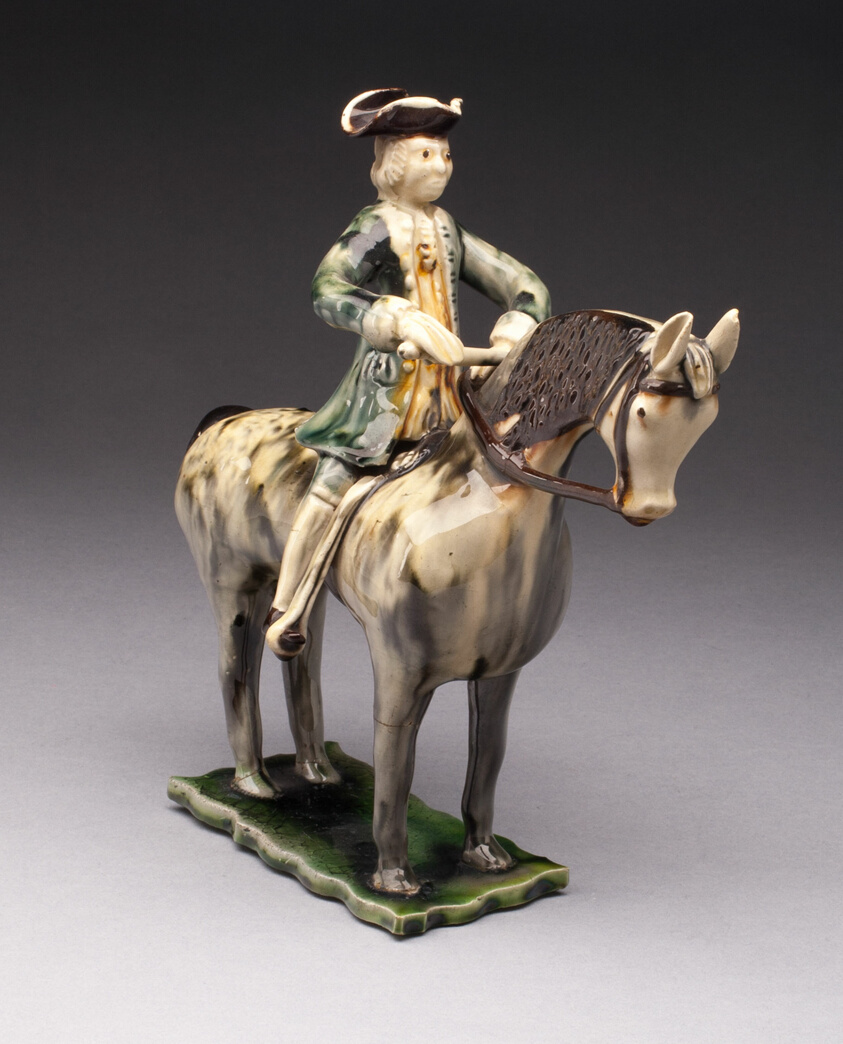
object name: Ceramics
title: Horse and Rider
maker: England, Staffordshire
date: c. 1760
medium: Lead-glazed earthenware (creamware and redware)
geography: Staffordshire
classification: earthenware; creamware; european decorative arts; redware; ceramics; lead-glazed earthenware